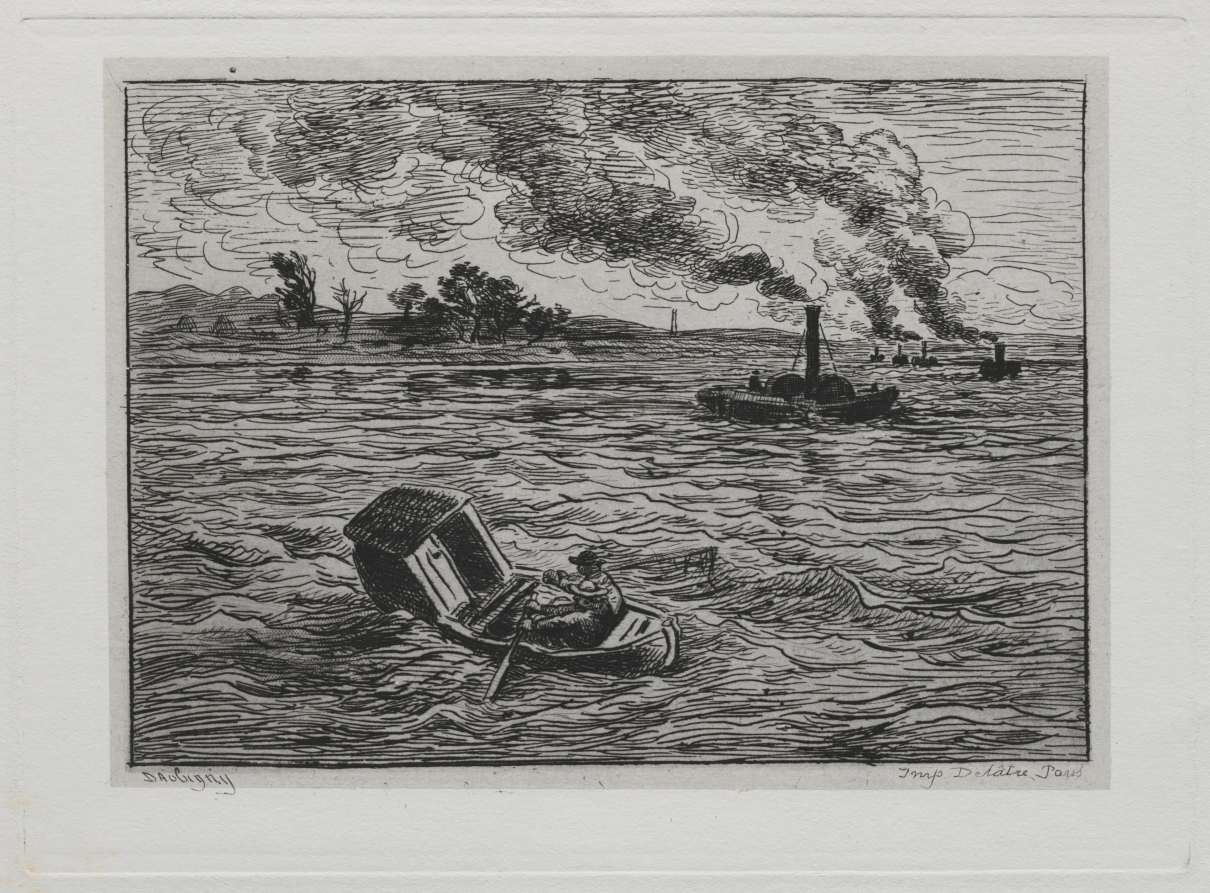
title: The Boat Trip: The Steamboats or Watch Out for the Steamers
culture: France, 19th century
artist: Charles François Daubigny (French, 1817–1878)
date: 1861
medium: etching with chine collé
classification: Portfolio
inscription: lower left corner, in graphite: L. D. III/III